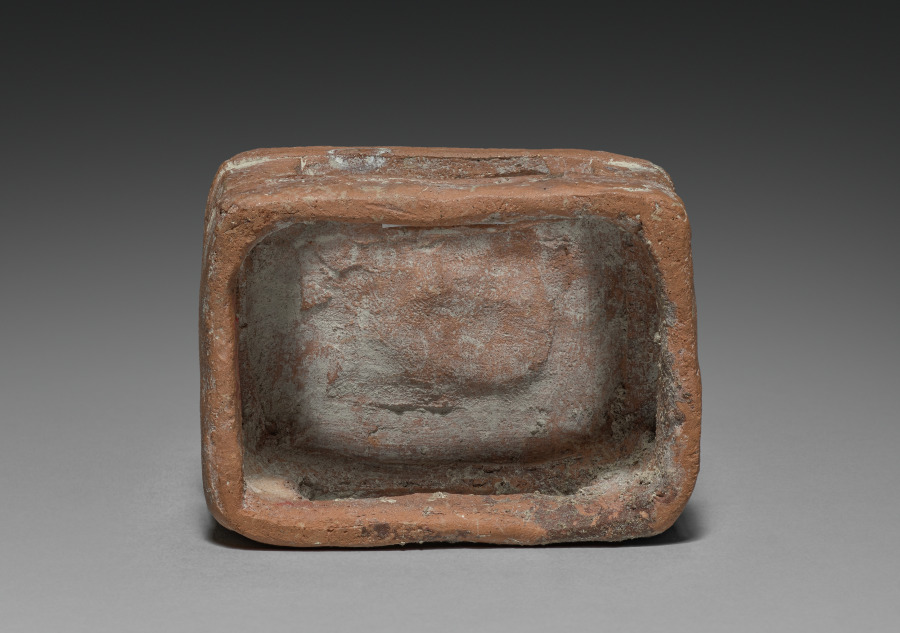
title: Seated Lord with Removable Headdress: Stool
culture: Mesoamerica, Maya, probably Jaina Island, Late Classical period, 7th-9th century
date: 600–800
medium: ceramic and slip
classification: Ceramic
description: The major Maya grave offerings on Jaina Island were ceramic figurines that depict deities and humans in a variety of roles. The stool belongs to a seated figure who represents a male, perhaps another warrior, who wears a huge zoomorphic headdress.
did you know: It is estimated that some 20,000 people were buried on the tiny island of Jaina over a 500-year period.